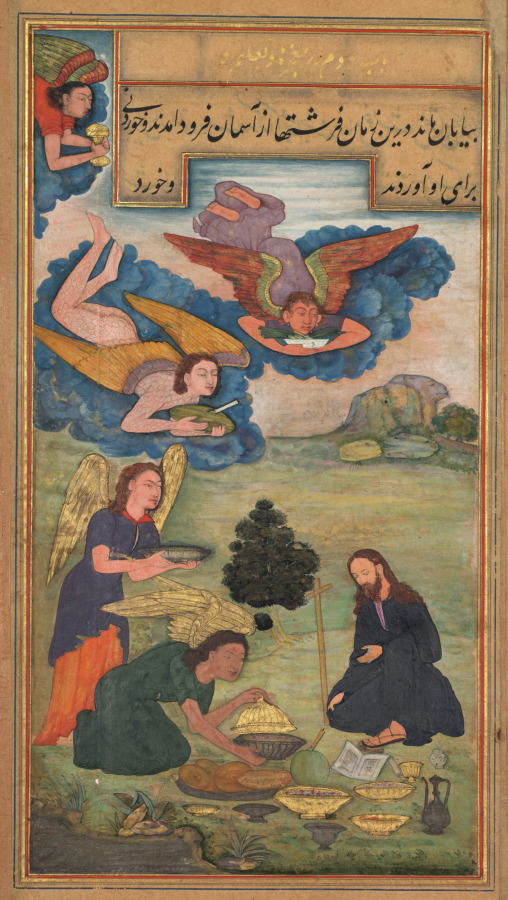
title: Angels bring food to Jesus in the wilderness (folio 55 recto), from a Mirror of Holiness (Mir’at al-quds) of Father Jerome Xavier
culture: Mughal India, Allahabad, made for Prince Salim (1569–1627)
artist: Muhammad Sharif (Indian, active c. 1600)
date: 1602–4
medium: Gum tempera, ink, color, and gold on paper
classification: Manuscript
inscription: Signature of the artist, Muhammad Sharif (Indian, active c. 1600), is written in the tiny pot by Jesus's foot.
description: To end his 40-day fast, five angels brought Jesus refreshments from heaven: breads, melons each with a knife for convenient cutting, fresh leeks, and what appear to be fragrant rice dishes and curries, along with cups of wine. Four of the angels are dressed in robes, and one is clothed only in feathers. After his baptism, Jesus spent 40 days and nights in the desert where he fasted, practiced spiritual exercises, and successfully resisted the temptations of Satan. Many of the rocks in this painting have faces, called grotesques. This page is the only surviving folio from this manuscript that has an artist’s signature, written in the tiny pot by Jesus’s foot.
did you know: The artist has put faces in the rocks, following a Persian convention.